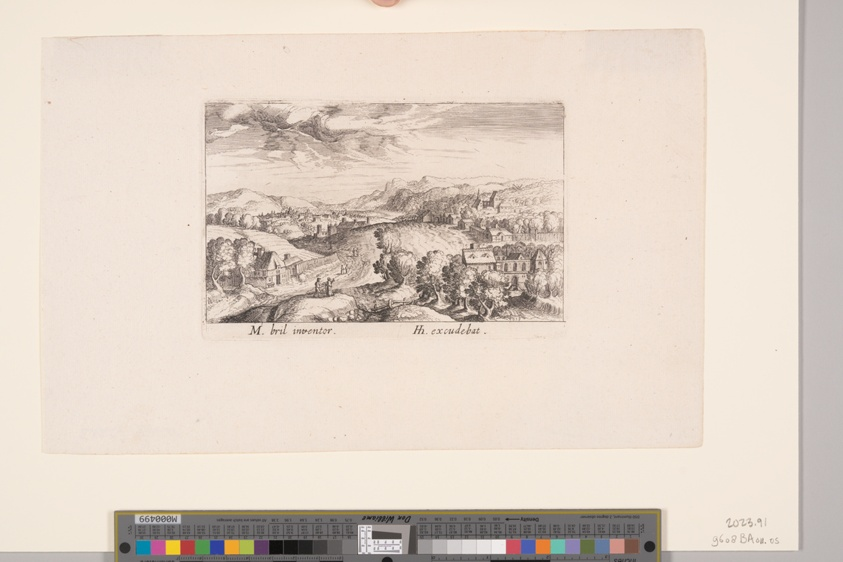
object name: Print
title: Hilly Landscape with Three Couples, from Topographia Variarum Regionum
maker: Simon Frisius (Dutch, c. 1580–1629); after Matthijs Bril (Flemish, 1550-1583)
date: 1614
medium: Etching on paper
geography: Netherlands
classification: etching; paper; print; prints and drawing